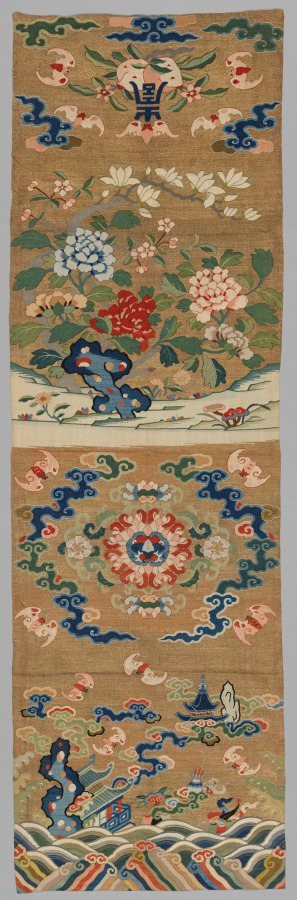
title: Hanging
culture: China, Qing dynasty (1644–1911)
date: 1700s–1800s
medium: silk and gold filé: tapestry weave, slit joins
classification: Textile